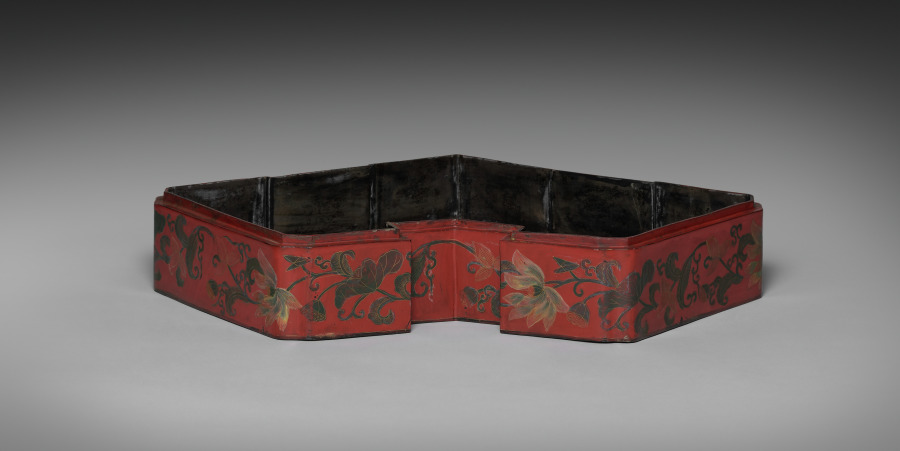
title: Lid for a Tiered Food Box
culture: Japan, Edo period (1615–1868)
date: late 1700s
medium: red lacquer over a wood core, with litharge painting and engraved gold designs (Ryukyuan)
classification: Lacquer